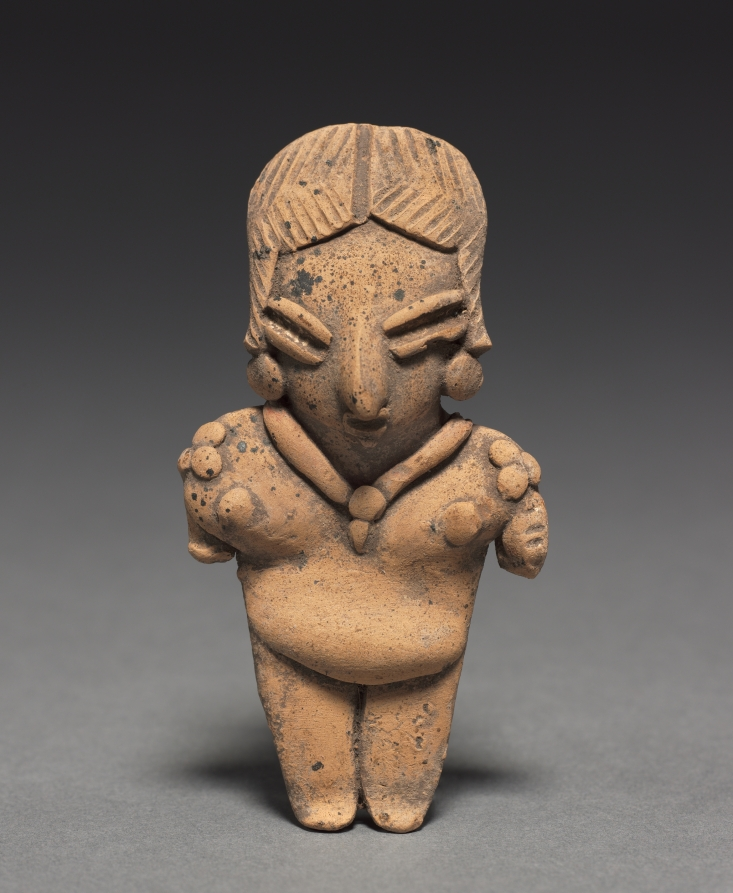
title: Female Figurine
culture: Mesoamerica, Mexico, Guanajuato, Chupícuaro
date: 400–100 BCE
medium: pottery with traces of white and red pigment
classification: Sculpture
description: The Chupícuaro culture, located north of Mexico City in the state of Guanajuato, created a distinctive ceramic tradition including small clay figurines. This example is said to belong to a group of ten figurines from the same burial or cache (1990.145–154). The group includes both males and females that can be sorted into couples based on size.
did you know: Groups of figurines were sometimes arranged in scenes and likely used in household rituals.